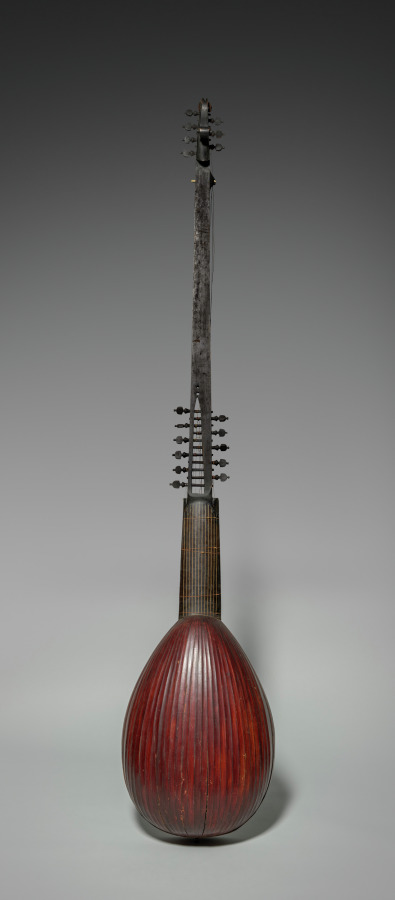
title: Chittarone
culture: Italy, late 17th century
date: late 1600s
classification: Musical Instrument